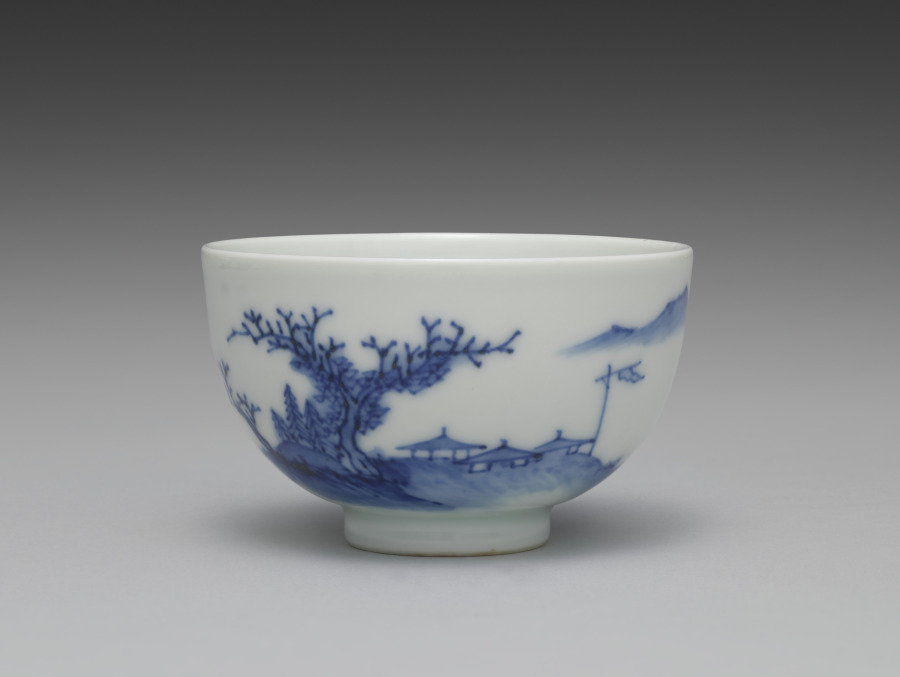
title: Teacup from Tea Set with Chinese Landscape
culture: Japan, Meiji period (1868–1912)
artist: Seifū Yohei III (Japanese, 1851–1914)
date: 1893–1914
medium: Porcelain with underglaze blue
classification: Ceramic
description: The theme of this sencha tea set is the Chinese scholar-recluse in an idyllic landscape. Each of the five teacups has a landscape with an architectural structure and some human activity. This tea set has a side-handled pot called a kyūsu, used for steeping, straining, and serving tea. Unlike some others, this set also has a yuzamashi, a container used to cool boiled water to just the right temperature for the best flavor when steeping. Seifū Yohei III’s painting teacher, Tanomura Chokunyū (1814–1907), made a visual record of famous sencha events that shows how these kinds of porcelains fit with objects such as a stove and kettle to form a complete set of utensils for tea preparation, and with ensembles of decorative objects meant to inspire creativity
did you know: This cup has a man walking toward a group of three pavilions announced with a banner hanging from a tall post; beyond this are two large deciduous trees sheltering a stand of small conifers. Across the water from this site is another man sitting on the bank fishing with a large woven basket for his catch beside him.